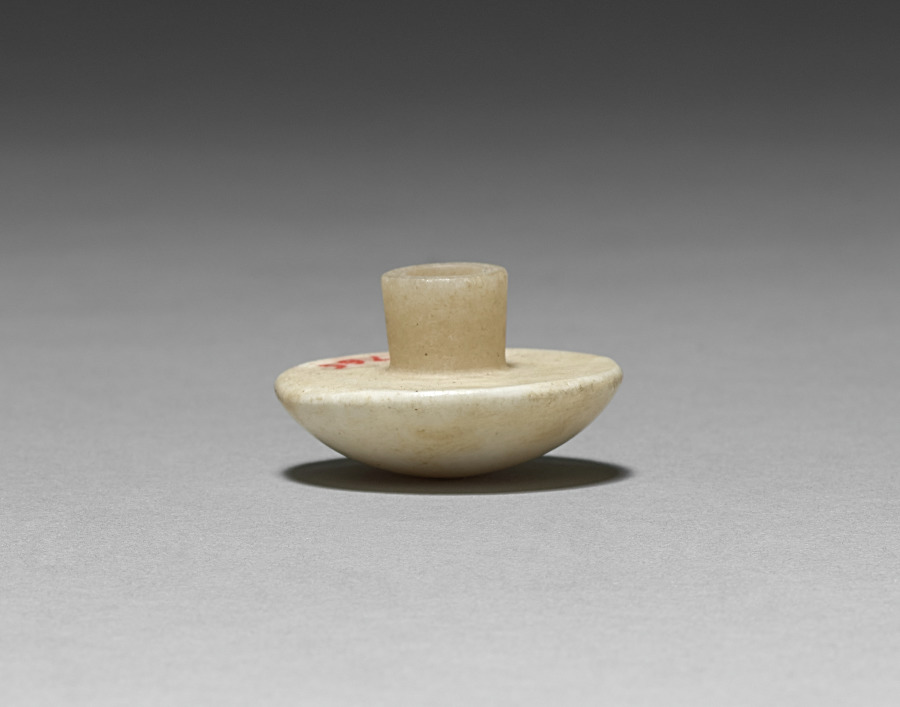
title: Earring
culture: Egypt, New Kingdom (1540–1069 BCE), Dynasty 18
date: 1540–1296 BCE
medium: travertine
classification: Jewelry